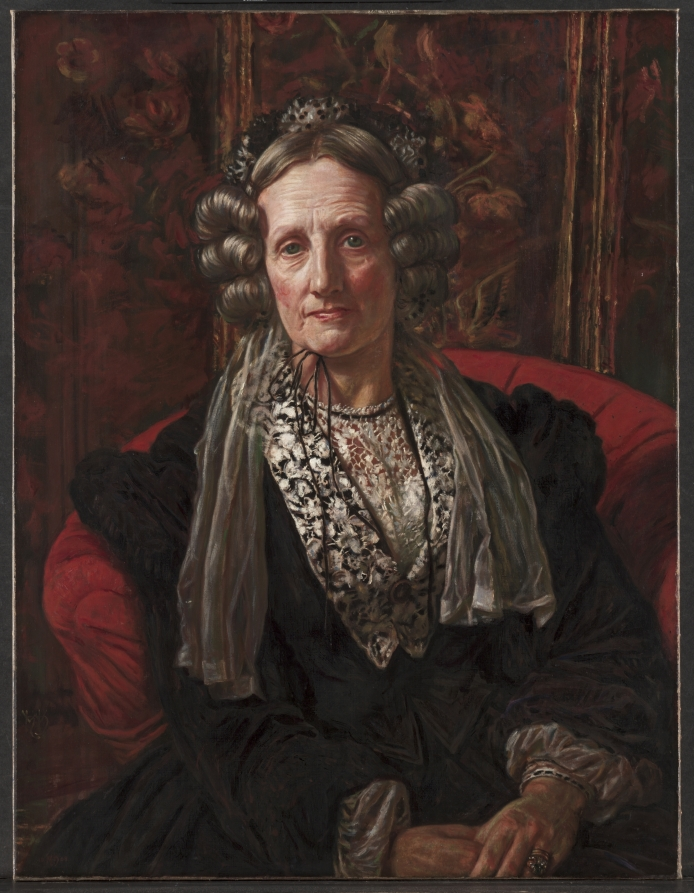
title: Mary Walker Waugh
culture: England, 19th century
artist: William Holman Hunt (British, 1827–1910)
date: 1868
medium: oil on fabric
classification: Painting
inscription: Signed and dated lower left: 18whh68 [initials in monogram]; and signed again lower left: whh [monogram]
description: William Holman Hunt painted this portrait of Mary Walker Waugh (1805–1886)—his mother-in-law—during a time of personal tragedy. Waugh’s daughter Fanny Waugh Hunt (1832–1866), the wife of the artist, had recently died following childbirth. References to loss of life infiltrate the composition: the sitter wears black mourning attire, and behind her is a screen decorated with red poppies, a traditional symbol of unconsciousness and lifelessness because of its pharmaceutical use as a source for opiates. In Victorian society, the red poppy also signified consolation.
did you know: British novelist Evelyn Waugh (1903–1966) once owned this portrait, which depicts his great aunt.